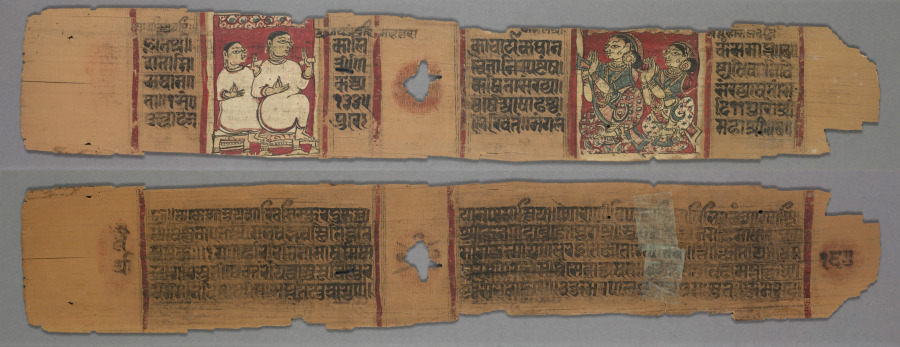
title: Folio 167, from a Kalpa-sutra and Story of Kalakacharya: two nuns teaching lay women (recto); genealogical text (verso)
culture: Western India, Gujarat, Palanpur (Prahladanapura)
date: 1278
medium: Gum tempera and ink on palm leaf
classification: Painting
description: This page is from the end of a manuscript, which contains two texts often paired together, the Kalpa-sutra and Story of Kalakacharya. The latter tells a story about a Jain teacher who used magic to overthrow an evil king. The lay women who listen reverently to the nuns’ teaching may be the donors who paid for the creation of the manuscript.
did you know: The year occurs in the fourth line, to the right of the nuns.